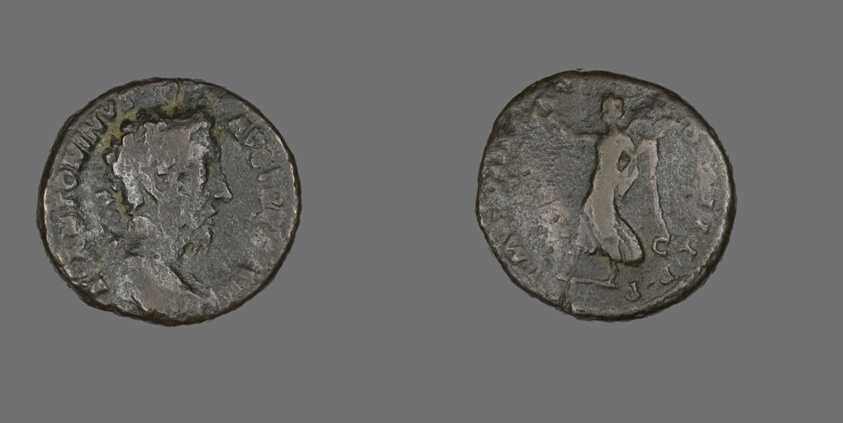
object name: Coin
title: As (Coin) Portraying Emperor Marcus Aurelius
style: roman (ancient, style or period), ancient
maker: Roman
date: December 177-December 178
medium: Bronze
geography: Roman Empire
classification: coin; ancient art